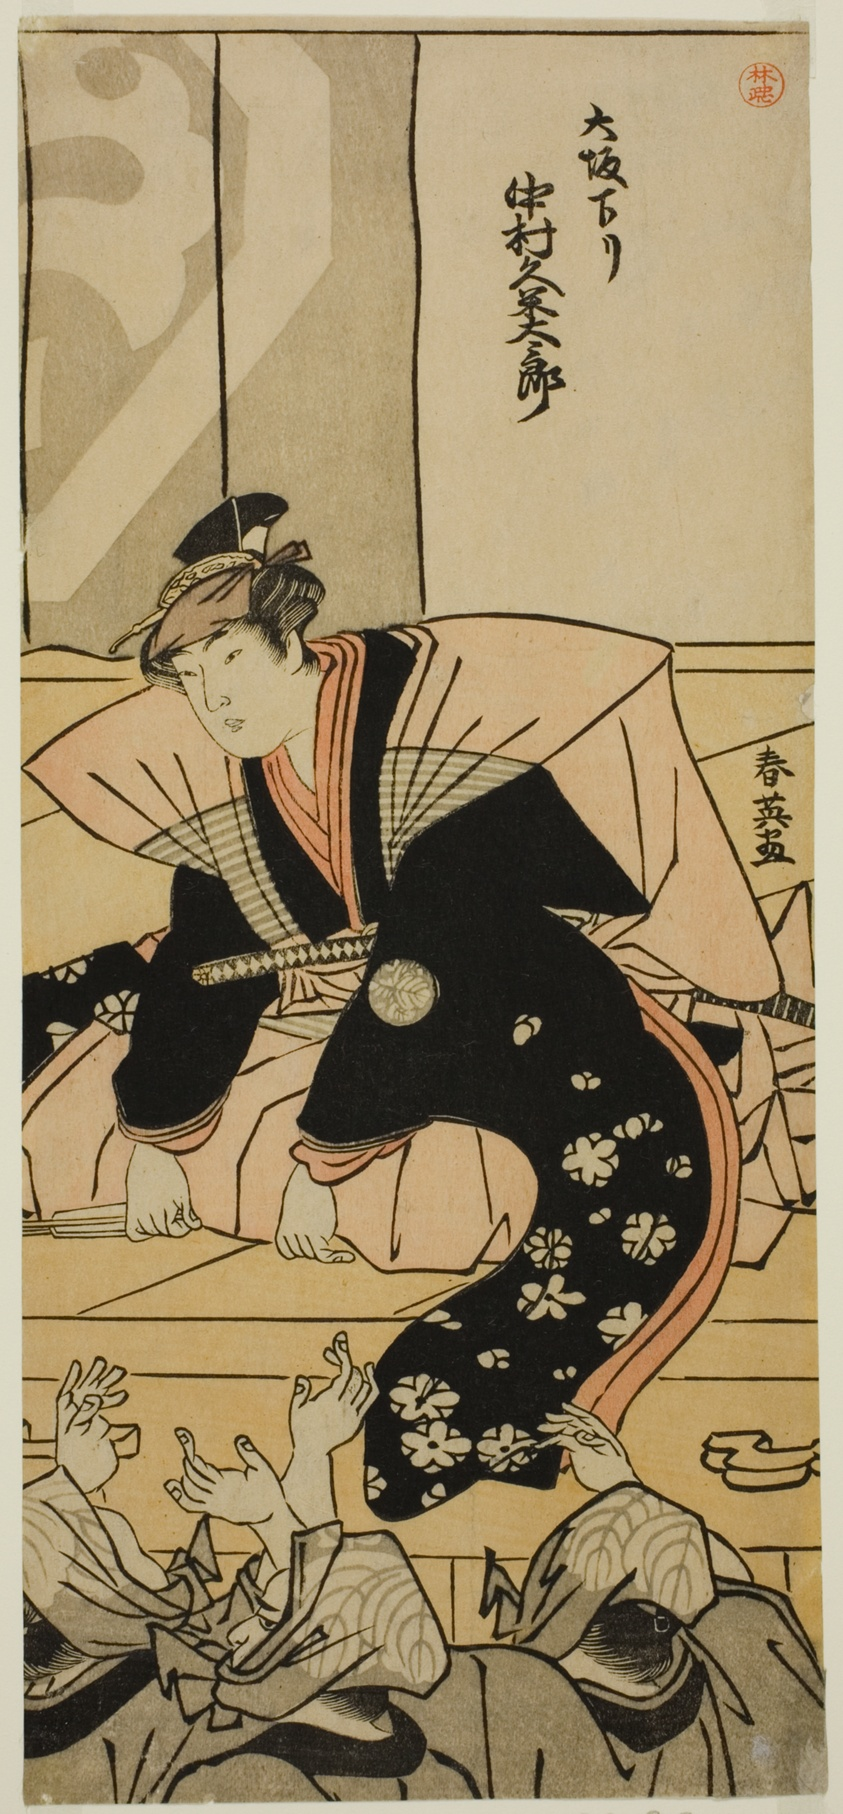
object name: Print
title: The Actor Nakamura Kumetaro II Greeting the Audience on His Arrival from Osaka at the Nakamura Theater in the Eleventh Month, 1790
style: Japanese (culture or style)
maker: Katsukawa Shun'ei (Japanese, 1762-1819)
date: c. 1790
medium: Color woodblock print; hosoban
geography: Japan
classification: woodblock print; print; asian art